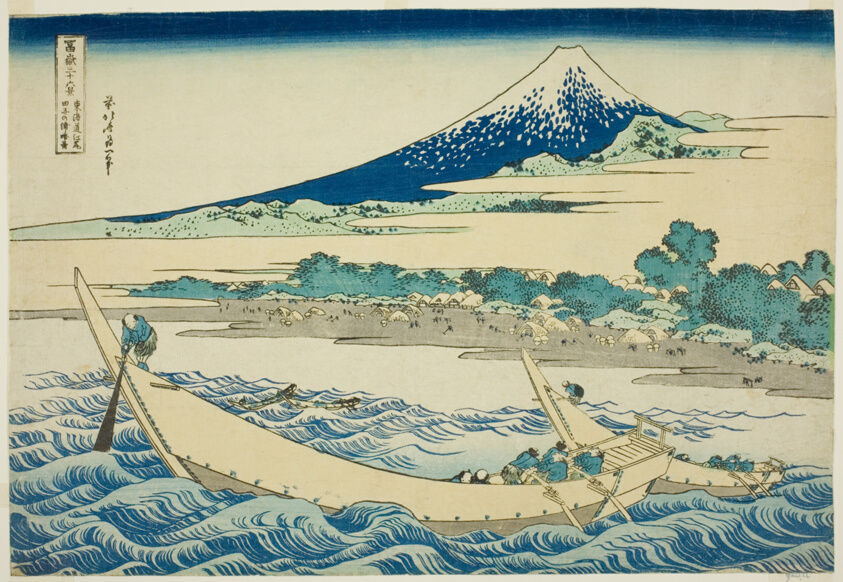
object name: Print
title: Tago Bay near Ejiri on the Tokaido (Tokaido Ejiri Tagonoura ryakuzu), from the series "Thirty-six Views of Mount Fuji (Fugaku sanjurokkei)"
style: Japanese (culture or style)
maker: Katsushika Hokusai 葛飾 北斎; Japanese, 1760-1849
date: c. 1830/33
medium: Color woodblock print; oban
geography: Japan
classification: woodblock print; print; asian art